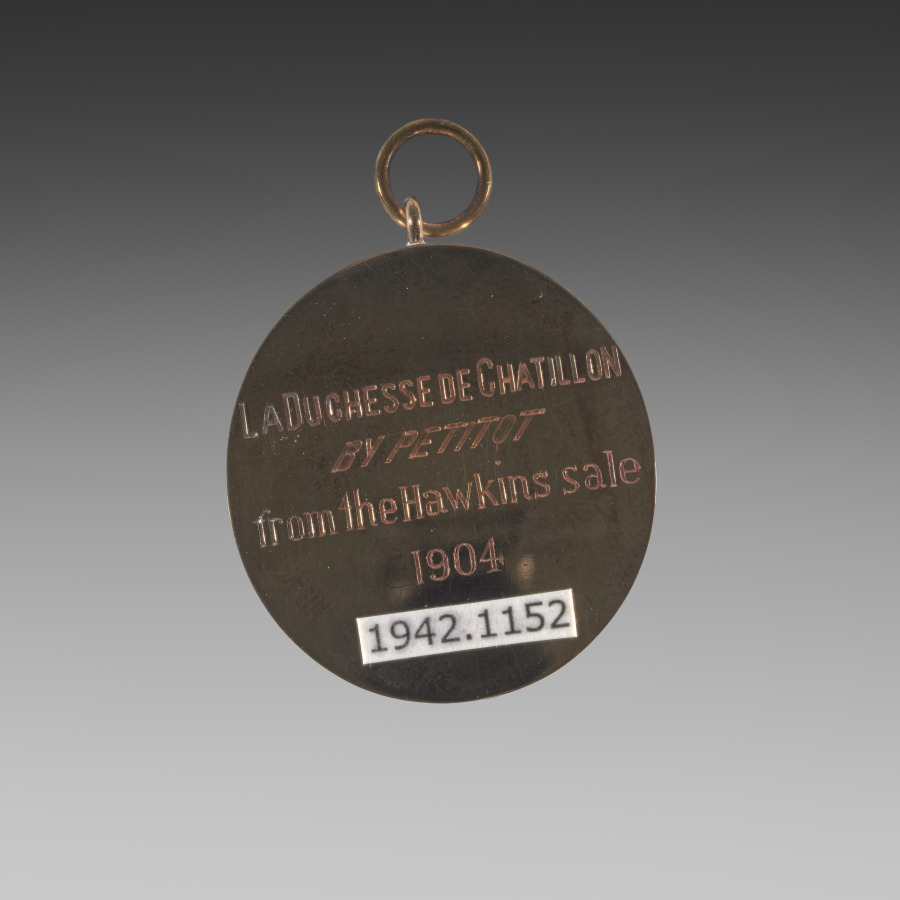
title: Portrait of a Woman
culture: France, 17th century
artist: Jean Petitot (Swiss, 1607–1691)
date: c. 1670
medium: enamel in a silver gilt frame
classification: Portrait Miniature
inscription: inscribed on back of frame: "La Duchess de Chatillon by Petitot from the Hawkins Sale 1904"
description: Unlike fragile portrait miniatures painted in watercolor on vellum or ivory, which are prone to cracking, fading, and flaking, enamels are resilient, impervious to the effects of light, and retain their striking original colors over time. Partly for this reason enamel was considered ideal for reproducing famous paintings and treasured portraits in a reduced and luminous form. The complicated and labor-intensive process of enameling required the artist to fire numerous layers of colored metal oxide at different temperatures, which made it difficult to produce a faithful portrait likeness, though masters of the medium were able create portraits of remarkable subtlety imbued with the sitter's personality. The heyday of enamel painting was the late 1600s and early 1700s. Among the enamel specialists was Petitot, who was patronized by King Charles I of England, King Louis XIV of France, and King John III Sobieski of Poland.